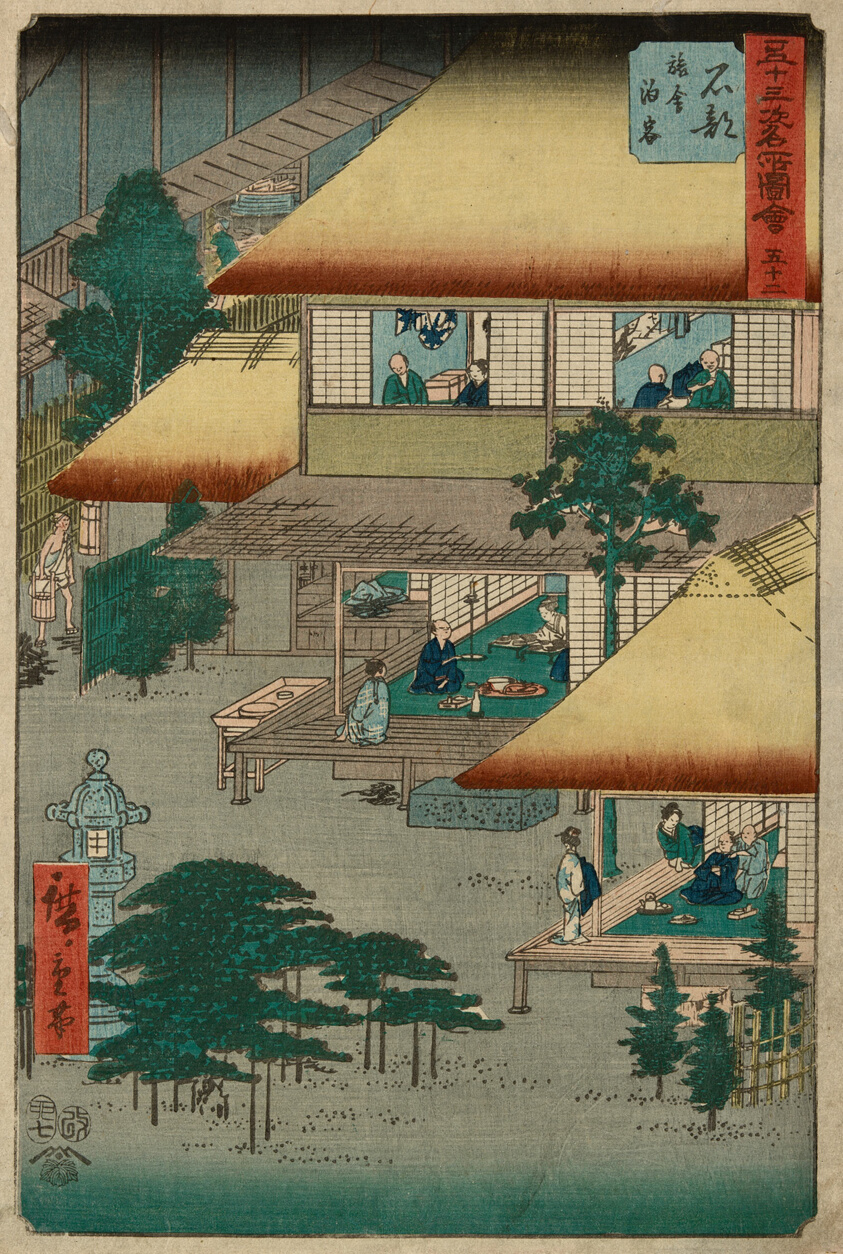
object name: Print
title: Ishibe, from the series “Fifty-Three Stations of the Tokaido”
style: Japanese (culture or style)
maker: Utagawa Hiroshige 歌川 広重; Japanese, 1797–1858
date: 1855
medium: Color woodblock print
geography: Japan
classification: woodblock print; print